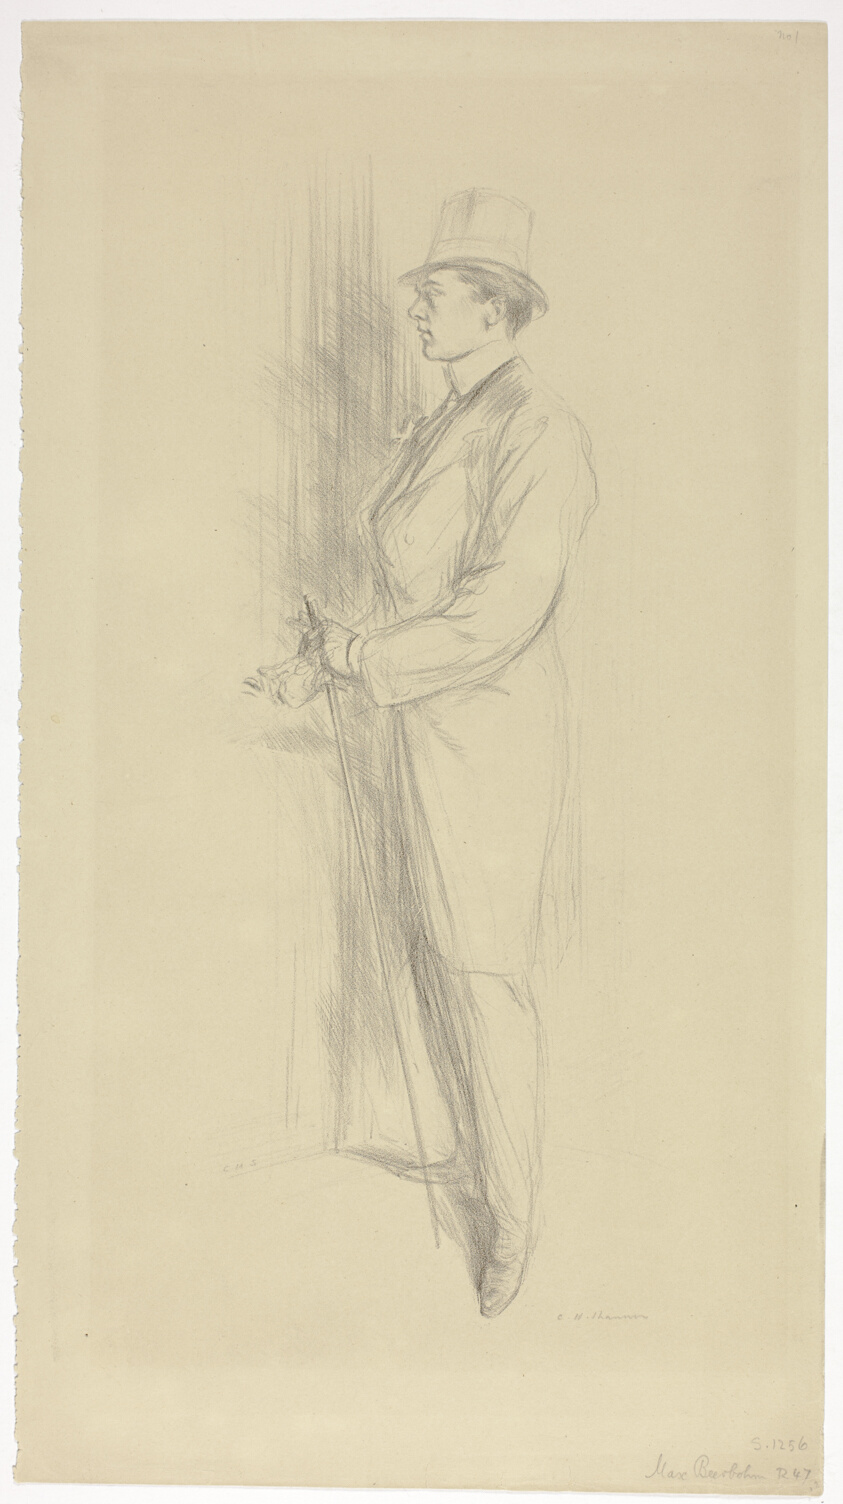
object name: Print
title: Max Beerbohm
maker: Charles Haslewood Shannon (British, 1863-1937)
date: 1896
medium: Lithograph in black on tan wove paper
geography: United Kingdom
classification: lithograph; print; prints and drawing